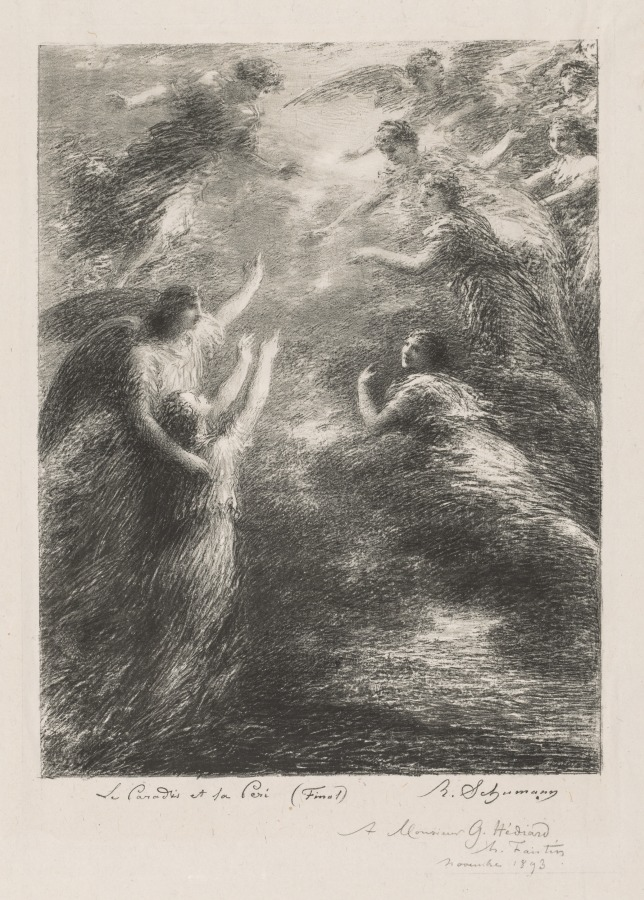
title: Le Paradis et la Peri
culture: France, 19th century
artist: Henri Fantin-Latour (French, 1836–1904)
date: 1893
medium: lithograph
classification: Print